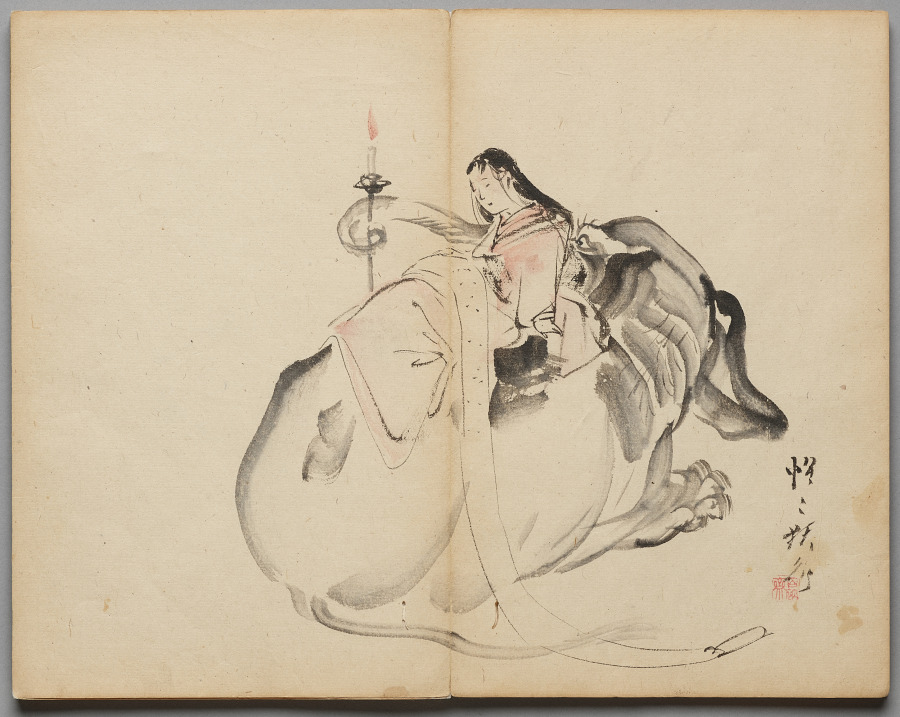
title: Stand-in Monju from Sketch Album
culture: Japan, Edo period (1615–1868) to Meiji period (1868–1912)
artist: Kawanabe Kyōsai (Japanese, 1831–1889)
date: mid- to late 1800s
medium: Accordion-style book of 26 double-leaves; ink and color on paper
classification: Bound Volume